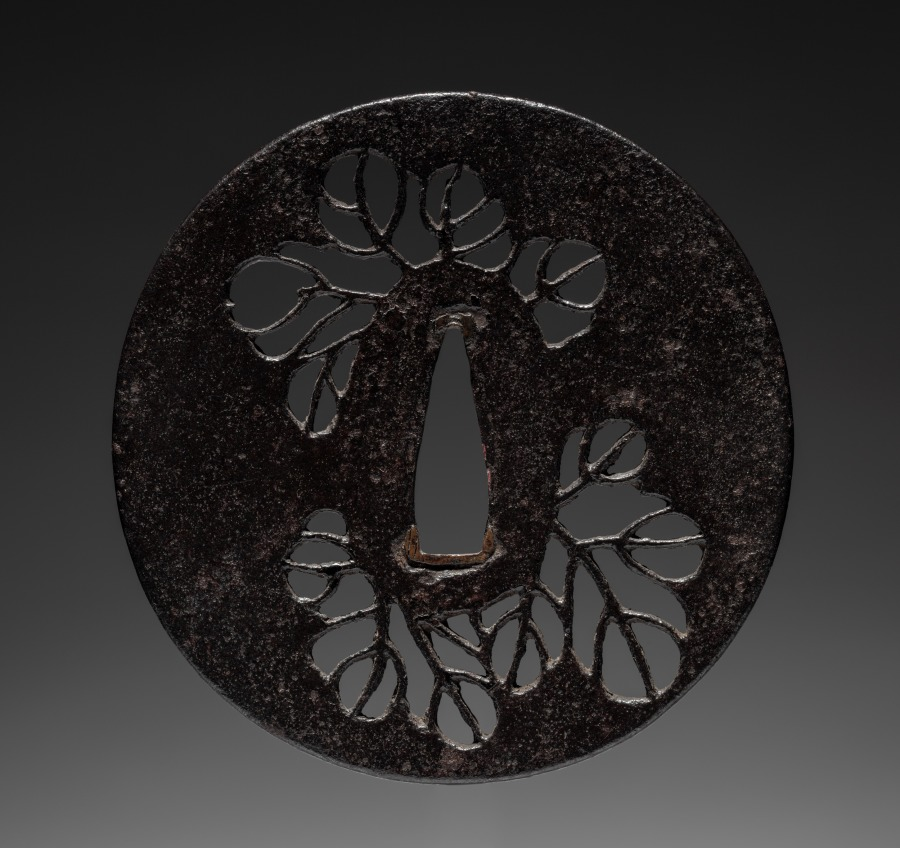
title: Sword Guard (Tsuba) with Leaves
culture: Japan, possibly Edo period (1615–1868)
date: c. 1615–1868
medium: metal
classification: Arms and Armor